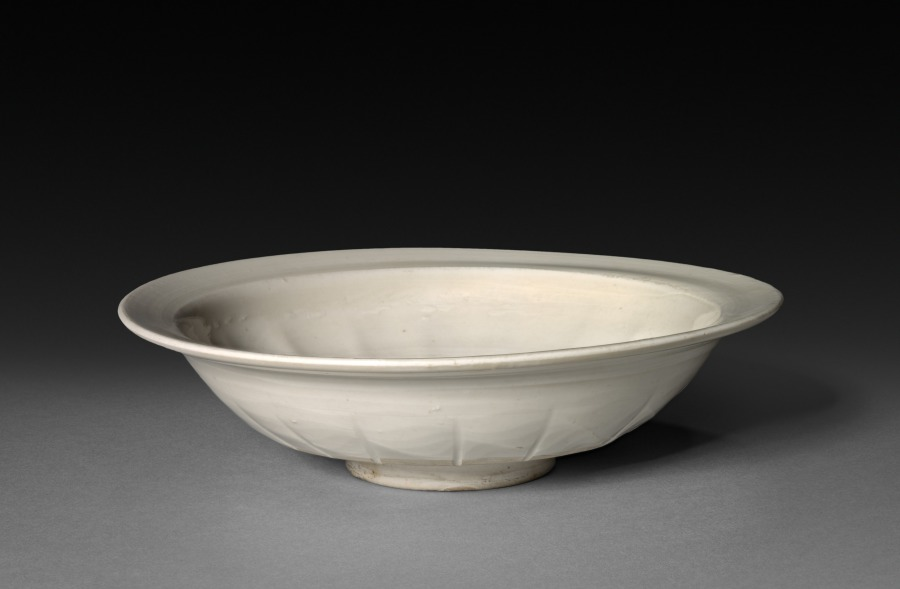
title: Circular Dish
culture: China, possibly Liao Kingdom, Northern Song dynasty (960-1127)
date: 12th Century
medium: white porcelain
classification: Ceramic